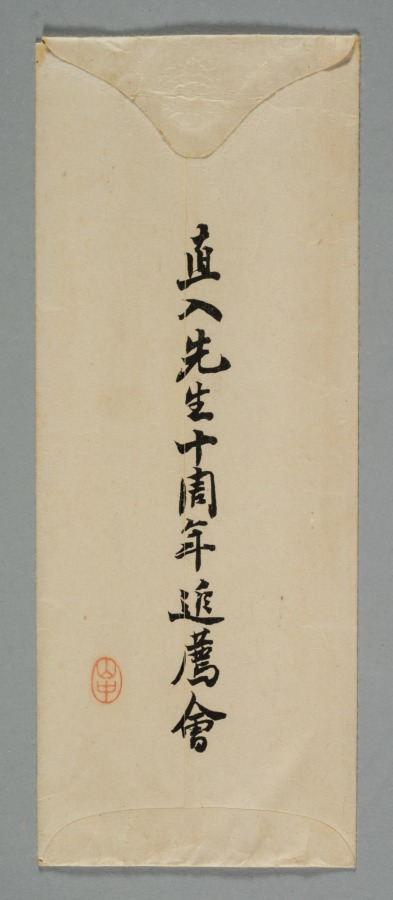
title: Mountain View and Blue Water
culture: Japan, Edo period (1615–1868)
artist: Tanomura Chikuden (Japanese, 1777–1835)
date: early 1800s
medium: hanging scroll; ink, color, and gold on paper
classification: Painting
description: Tanomura Chikuden was an eminent painter whose adopted son, Tanomura Chokunyū (1814–1907), was Seifū Yohei III’s painting teacher. This work was displayed at a gathering commemorating the 10th anniversary of Chokunyū’s death, something we know only because its custom-made box and archival documents have been carefully kept together. The box inscription also confirms that Chikuden was emulating the style of the Mi family of painters, active during China’s Southern Song dynasty (1127–1279). The painting’s Chinese-style silk wrapper is inscribed and sealed on its interior by members of Chokunyū’s community.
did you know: The mountain shapes are built up with multiple small wet strokes.